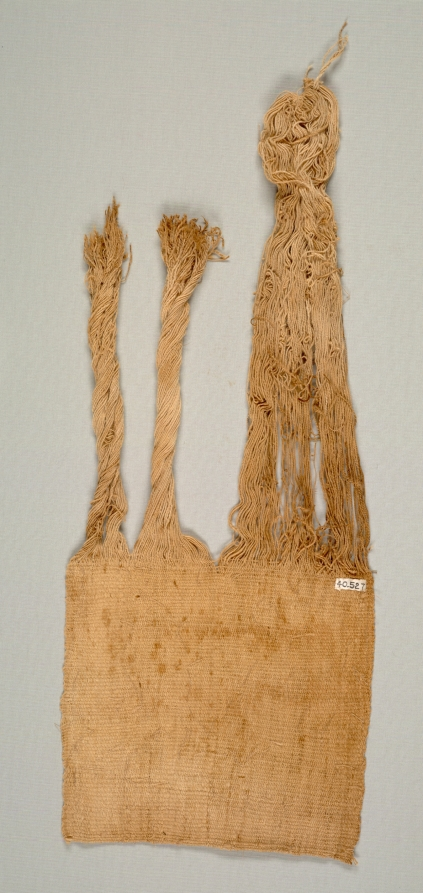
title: Mummy Bundle "Mask"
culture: Peru, South Coast, Ica Valley, Ocucaje site, Paracas style (700 BCE–1 CE)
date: 400–200 BCE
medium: Cotton and pigment; plain weave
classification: Textile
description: The Paracas people buried their dead in bundles that they created by carefully wrapping the seated human body in layers of garments and other textiles. In some cases, they placed a painted cloth—such as these examples—on the outer layer and at the top of the bundle. The hair-like yarns (unwoven warps) were arranged around a solid cotton disk that was sometimes wrapped with a headband. The cloths, then, seem to have functioned as the bundle’s head, even though some are painted not with faces but with complete figures whose supernatural character is marked by the appendages streaming from their bodies.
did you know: These masks fall into two categories, those with only a face and those with a full-bodied figure.